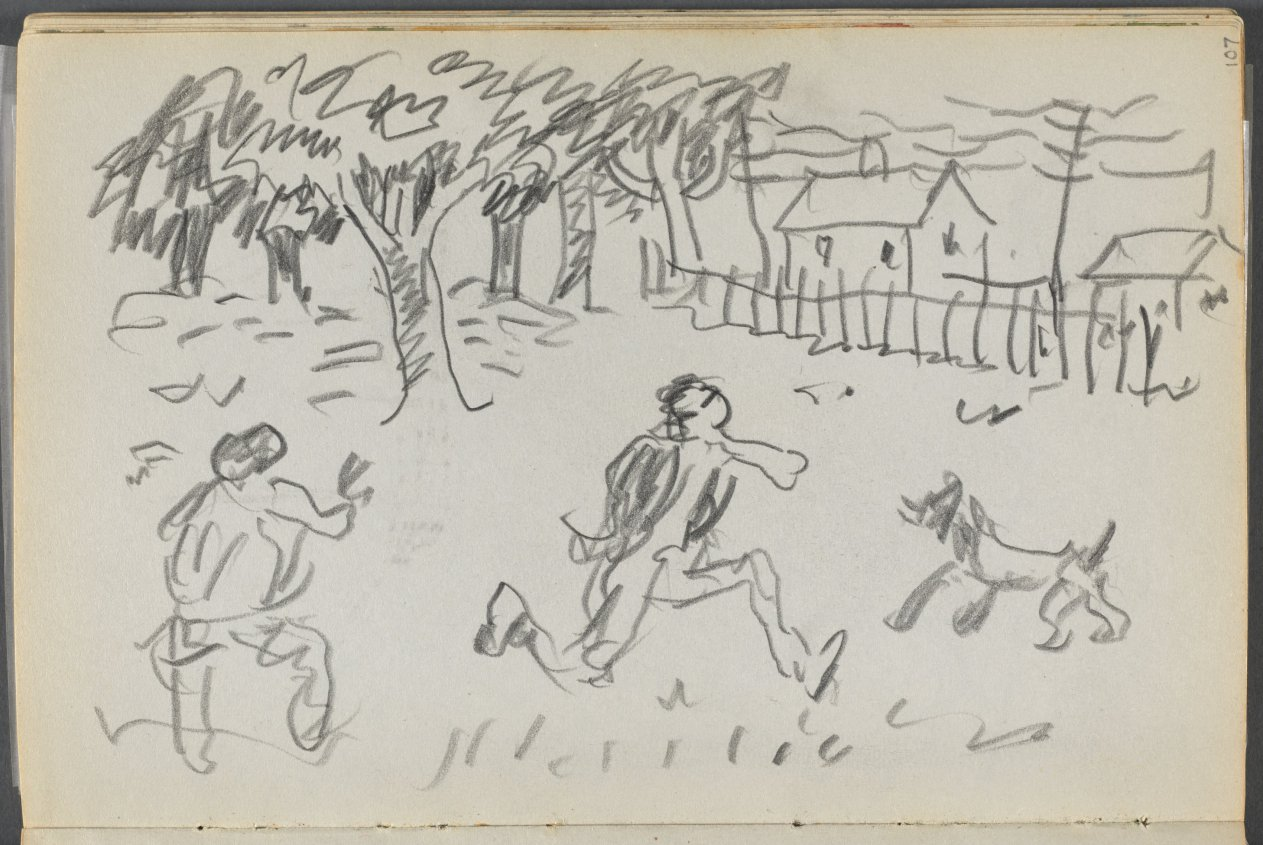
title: Sketchbook, The Dells, N° 127, page 107: Landscape with Figures and dog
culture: America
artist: Maurice Prendergast (American, born Newfoundland [now Canada], 1858–1924)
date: c. 1919–1921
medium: graphite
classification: Bound Volume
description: This sketchbook contains 59 pages of graphite drawings and 16 watercolors made at various locations on Cape Ann, Massachusetts.